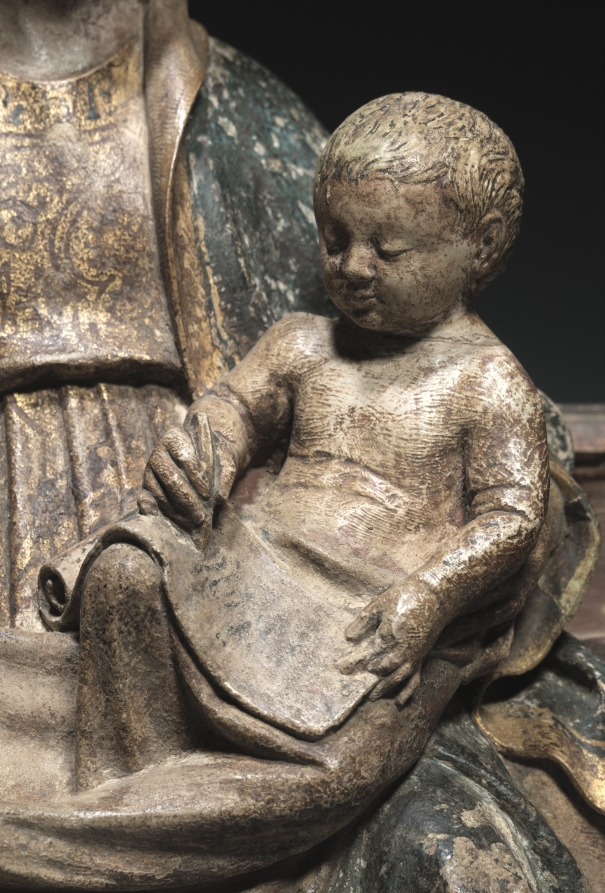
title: Enthroned Virgin with the Writing Christ Child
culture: Franco-Netherlandish, active Paris(?), 15th century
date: c. 1400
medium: limestone with polychromy and gilding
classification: Sculpture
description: This sculpture belongs to a tradition of seated Virgins that were prominent in Netherlandish art in the decades around 1400, and by extension may be associated with the Valois courts at Paris, Dijon, and Bourges. The theme of the Christ child who writes into an open book or onto a vellum banderole emerged during the third quarter of the 14th century and had great appeal among ecclesiastical and aristocratic clients. It undoubtedly refers to the educating and nurturing role of the mother in teaching the child, but also to the future position of the adult Christ as author and teacher. The small scale of this sculpture and the fact that its back is uncarved suggest that it was made for a small alcove or niche, appropriate in the intimate setting of a small chapel or oratory. The sculpture would have primarily been viewed from the front and perhaps from slightly below.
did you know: Here the Virgin is sitting on a highly decorated pillow.